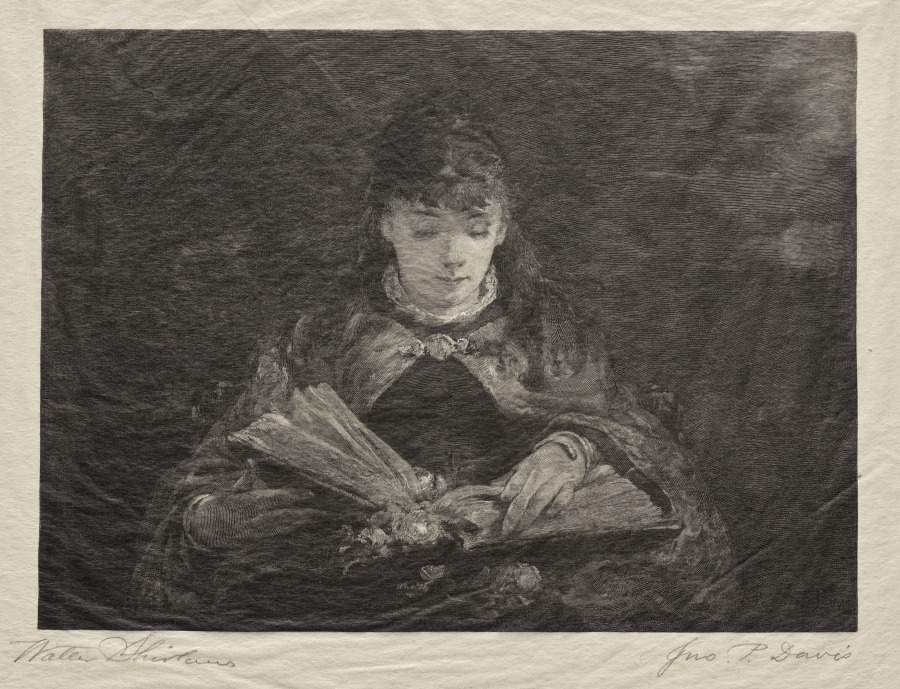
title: Among the Old Poets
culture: America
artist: John Parker Davis (American, 1832–1910)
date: 1887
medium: wood engraving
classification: Print